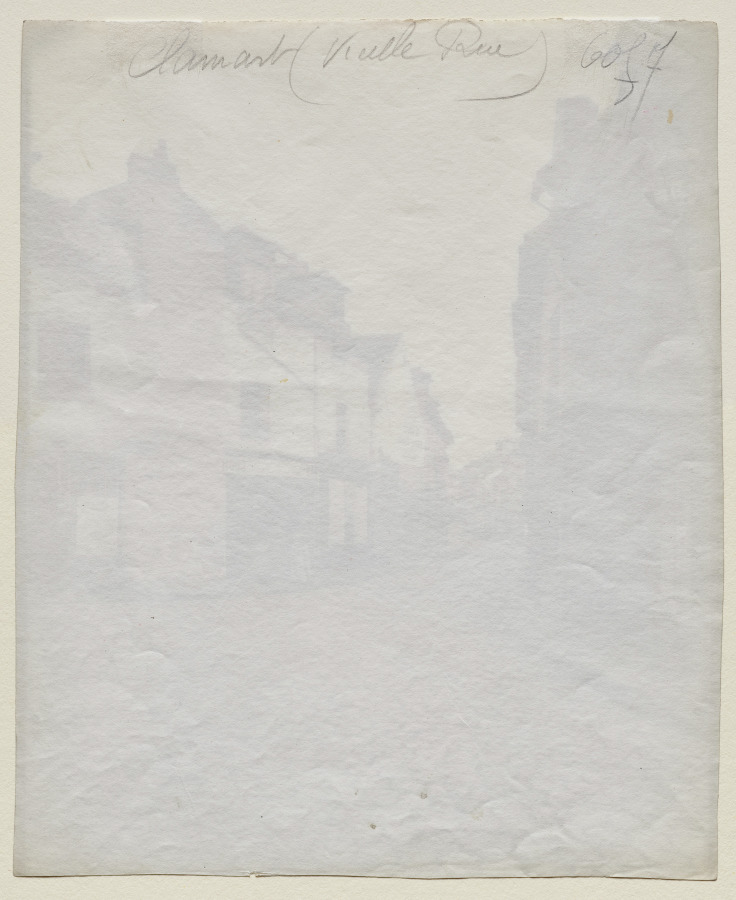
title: Clamart (Vielle Rue)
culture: France, 20th century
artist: Eugène Atget (French, 1857–1927)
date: before 1914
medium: albumen print from glass negative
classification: Photograph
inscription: Written in pencil on verso: "Clamart (Vielle Rue) 60 F"